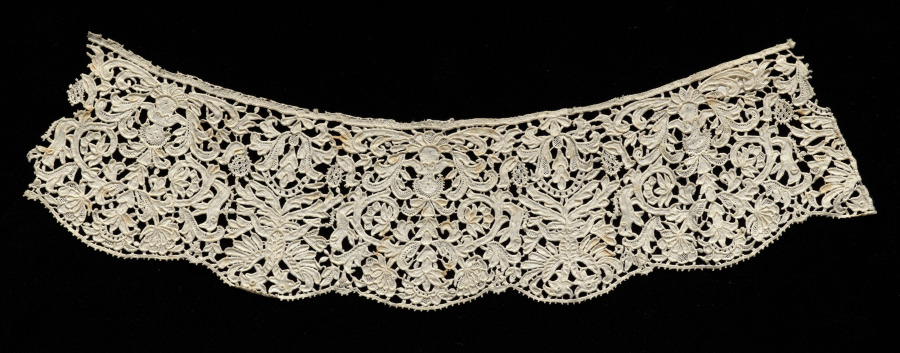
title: Lace Edging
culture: Italy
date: 1560–99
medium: Linen: needle lace (Punto in aria)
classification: Lace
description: This lace edging design includes double-headed eagles, mermaids, animals, and floral motifs.